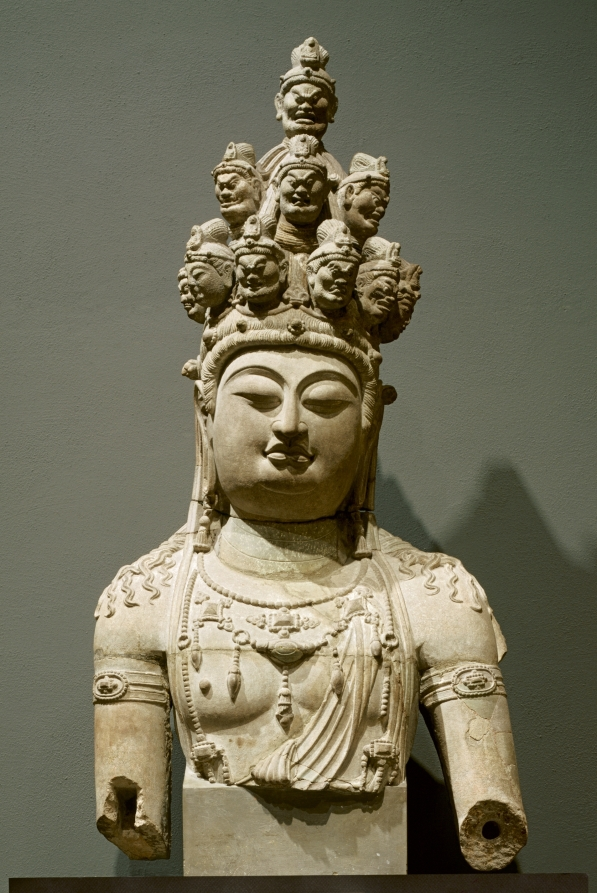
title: Eleven-Headed Guanyin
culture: China, Tang dynasty (618-907)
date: early 700s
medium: gray sandstone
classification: Sculpture